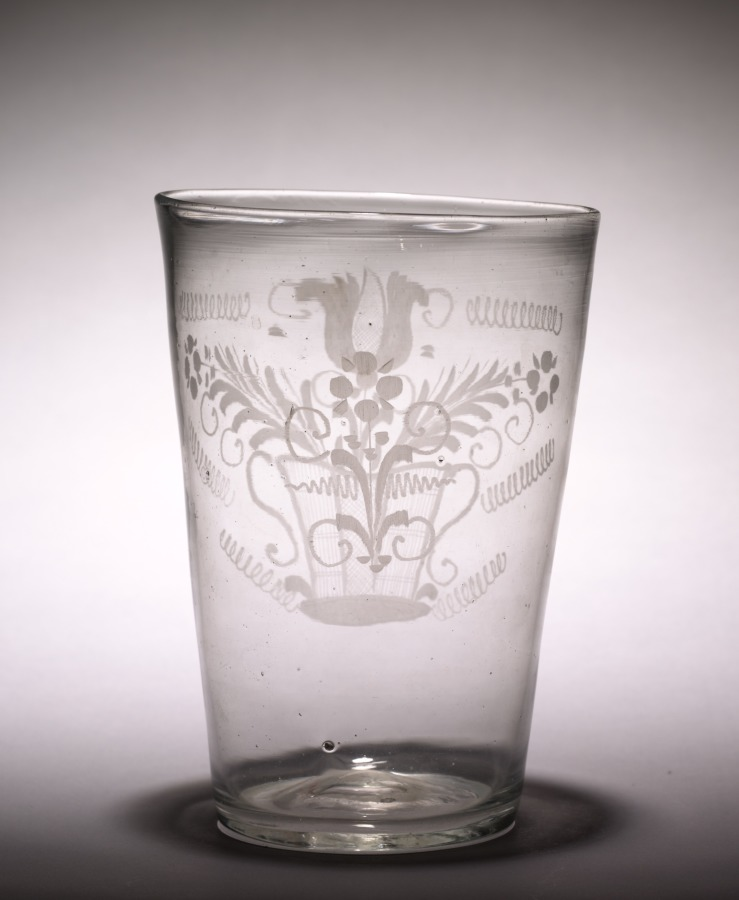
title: Beaker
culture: America, late 18th century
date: late 1700s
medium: glass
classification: Glass